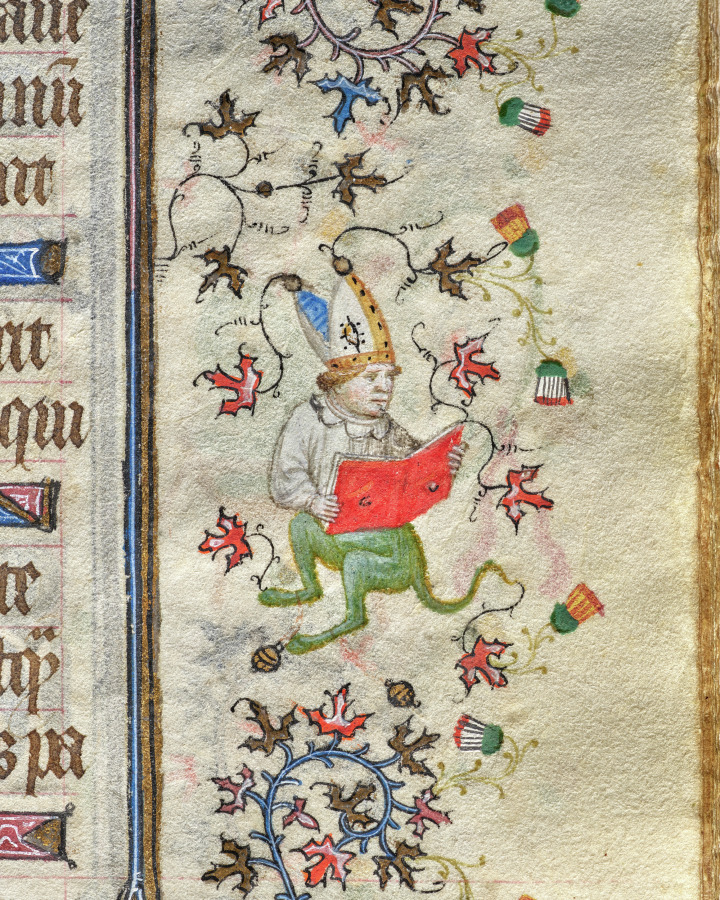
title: Hours of Charles the Noble, King of Navarre (1361-1425): fol. 85r, Text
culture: France, Paris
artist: Master of the Brussels Initials and Associates (French)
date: c. 1405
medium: ink, tempera, and gold on vellum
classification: Bound Volume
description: This precious volume was obviously highly prized by its owner, the French-born King of Navarre, who had his coat of arms painted on no less than twenty folios. Rather than directly commissioning this manuscript from a specific workshop, it seems that Charles the Noble acquired his book of hours -- perhaps ready-made for the luxury market -- while on a trip to Paris in 1404-05. A collaborative effort, six painting styles are evidenced within the pages of this codex, those of two Italians, two Frenchmen, and two Netherlanders. The painter who was responsible for the planning and decoration of the book, and who produced seventeen of the large miniatures, was a Bolognese artist known as the Master of the Brussels Initials. His principal assistant, responsible for most of the borders, was a Florentine who signed his name "Zecho" da Firenze on folio 208 verso.